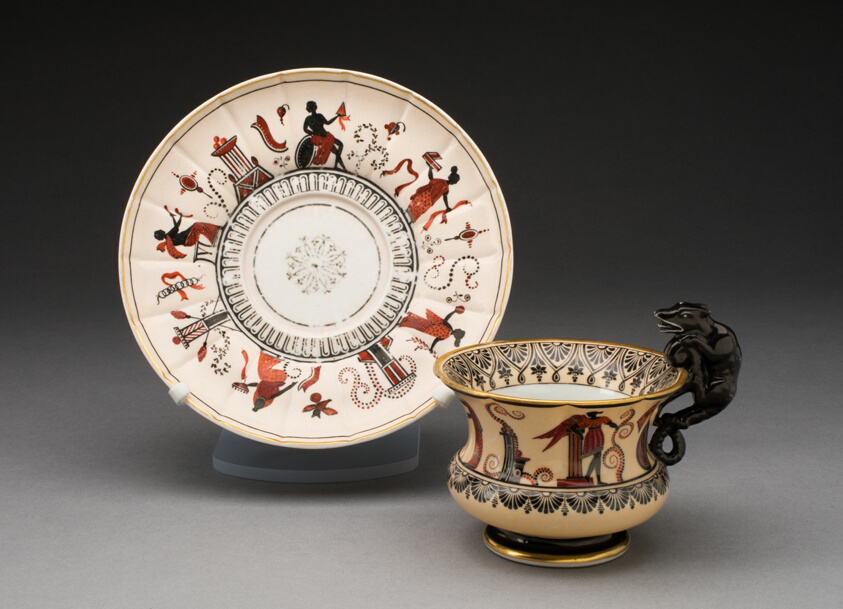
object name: Ceramics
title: Cup and Saucer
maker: Russian Imperial Porcelain Factory (Russian, founded 1744)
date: 1825/55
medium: Porcelain with polychrome enamels and gilding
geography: Saint Petersburg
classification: drinking vessel; porcelain; european decorative arts; ceramics